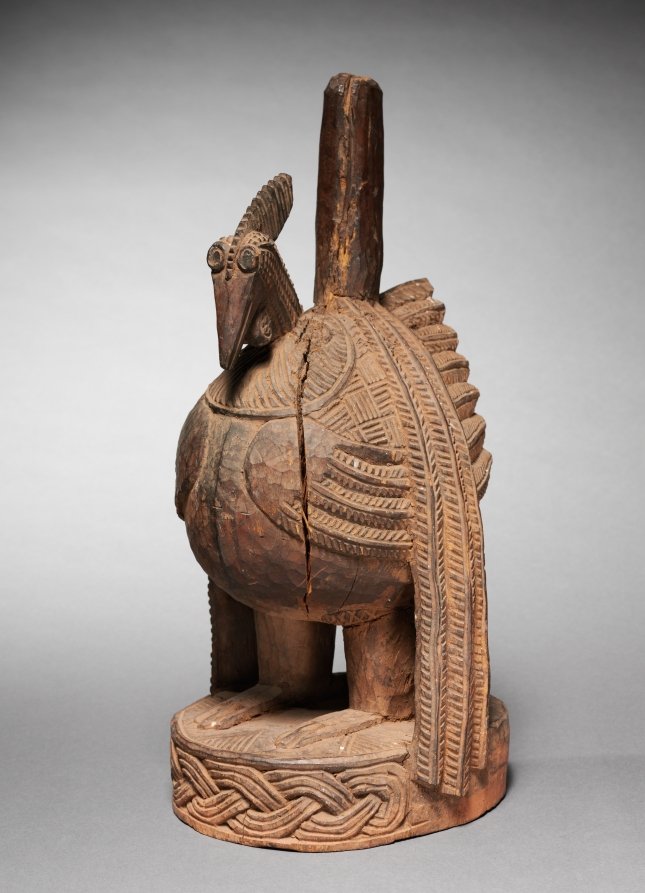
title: Hen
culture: Nigeria, Benin Kingdom, Ẹdo peoples, member(s) of the Igbesanmwan (wood and ivory carvers) guild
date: 1900s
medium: wood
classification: Sculpture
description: Materials used for ritual objects correspond with the status of their owner, or the person it was dedicated to. Men have cast brass roosters, while women have carved wooden hens like this. This egg-shaped bird is covered with patterns formed by parallel lines indicating the bird’s feathers, from fluffy tufts to sleek plumage. Realistically carved, it replicates an animal that would be sacrificed on a woman’s shrine. On an ancestral altar, it sat alongside other objects like rattle staffs. While Benin is patriarchal (men and their male sons lead), women are important; men cannot succeed spiritually or politically without them.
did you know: The interlacing pattern on the base of this sculpture can be seen in Benin Kingdom works in materials from wood to ivory to metal.